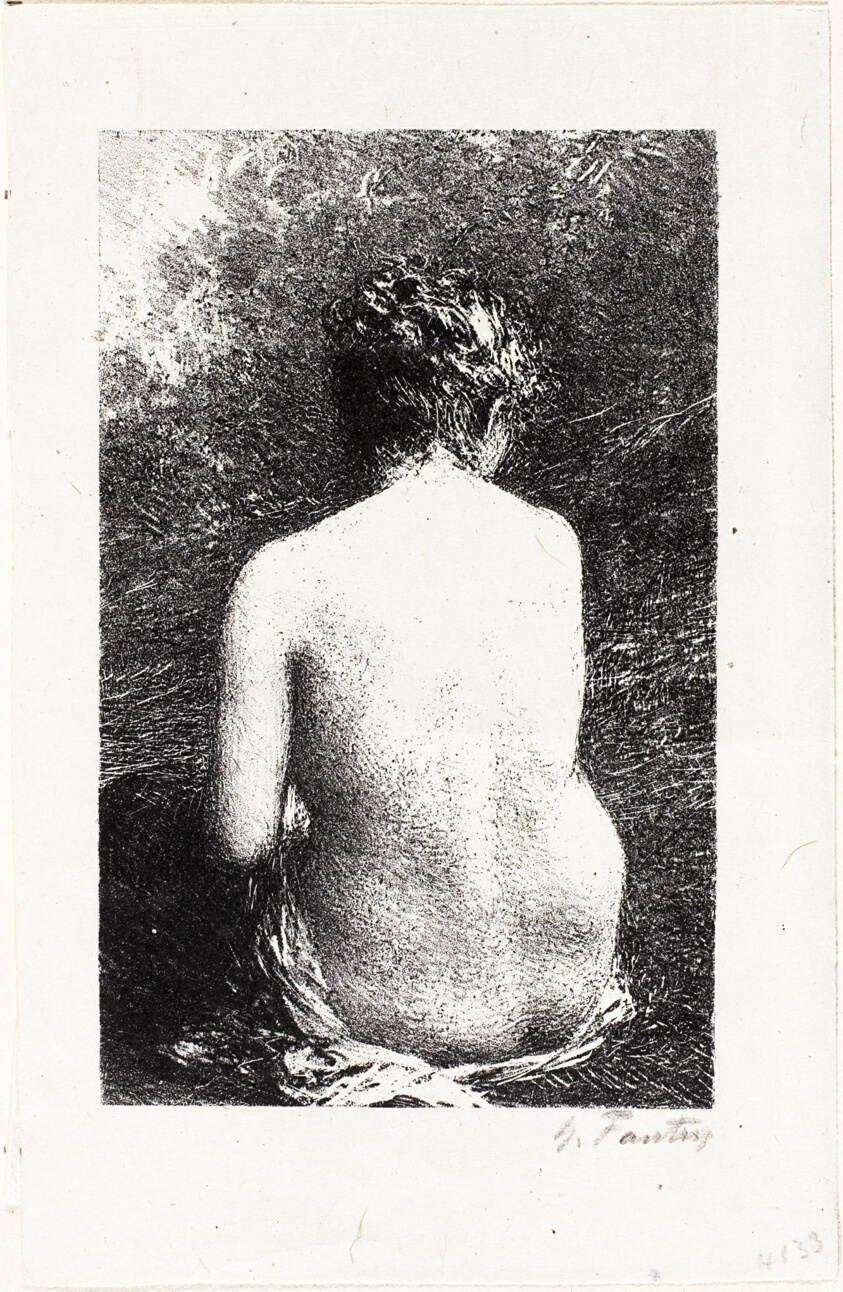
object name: Print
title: Study of Seated Woman, Seen from Behind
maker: Henri Fantin-Latour (French, 1836-1904)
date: 1897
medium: Lithograph in black on white chine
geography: France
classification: lithograph; print; prints and drawing